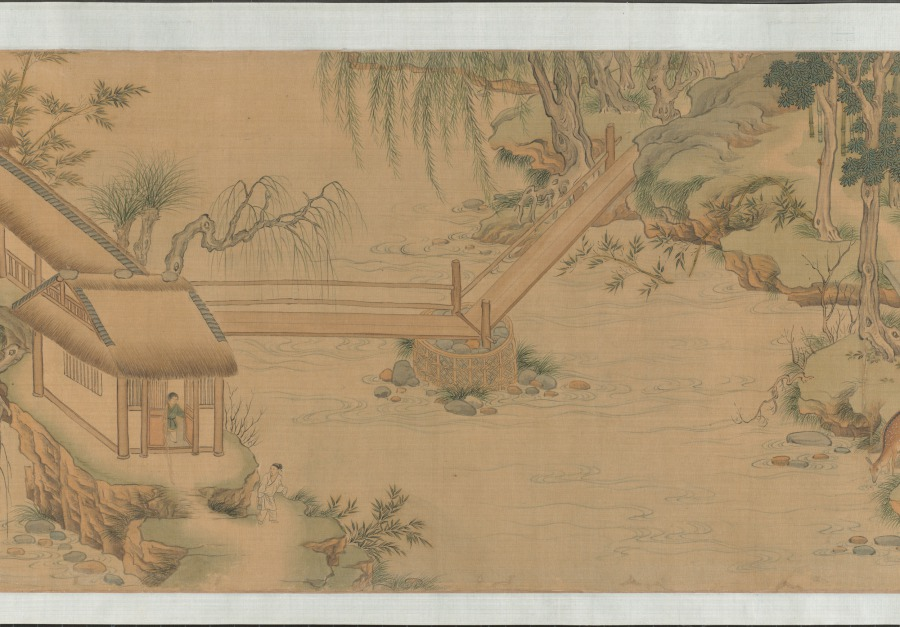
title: Garden for Solitary Enjoyment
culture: China, Ming dynasty (1368–1644)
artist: Qiu Ying (Chinese, 1494–1552)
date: 1515–52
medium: Handscroll; ink and light color on silk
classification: Painting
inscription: Accompanying text of an essay together with seven poems of Sima Guang (1019–1086) and one poem of Su Shi (1037–1101) written by Wen Zhengming (1470–1559) in 1558.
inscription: 2 colophons and 82 seals: 4 seals of Wen Zhengming 文徵明 (1470–1559); 59 seals of Xiang Yuanbian 項元汴 (1525–1590); 1 colophon, dated 1644, and 7 seals of Xiang Yukui 項禹揆 (c. late 1500s–1659); 1 colophon, dated 1880, and 2 seals of Weng Tonghe 翁同龢 (1830–1904); 2 seals of Ch'eng Chen-i (19th c.); 1 seal of Han Ch'ung (19th c.); 4 seals of Wan-go H. C. Weng 翁萬戈 (1918–2020); 3 seals unidentified.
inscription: Colophon by Xiang Yukui 項禹揆 (c. late 1500s–1659): The painting of The Garden for Self-enjoyment on the right by Shih-chou, Mr. Qiu [Qiu Ying] is in the style of Li Lung-mien. Its mood is peaceful, as if meeting the ancient gentlemen face to face among the brushes and silk; it lifts one above the sordid bustle of life. Formerly, my late father handed me this scroll which had only the painting without the written essay. I considered asking a good calligrapher to write the essay to add to it but was afraid that the quality of the writing would not match the painting. Several years later, I saw at a friend's house this essay and poems (of Ssu-ma Kuang] written by Hengshan [Wen Zhengming], once owned by my grandfather; so I spared no expense to obtain it. I rejoiced at this and said: "The divine swords are finally united. How things are pre-destined!" Now my friend Chang Kung-chao's technique for mounting [painting and calligraphy] is excellent. Therefore by daring to take them out and join them together, I can preserve this beautiful story of singular reunion. Xiang Yukui recorded at Hai-yeh-t'ang [hall] two days before New Year's Eve in the jiasheng year of the Chongzhen era [1644]. trans. LYSL/HK/WKH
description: Garden of Solitary Enjoyment refers to a site built in 1073 by the statesman Sima Guang (1019–1086) after he had retired to Luoyang, Henan province. Every spring, visitors would flock to his garden. Each of its seven structures references a historic figure. Sima wrote: I channel streams [like Du Mu], to water flowers [like Bai Juyi], or trim bamboo [like Wang Huizhi]. . . . I know of no joy between heaven and earth that could take its place. Qiu Ying’s painting, created after an 11th-century version of the same theme, must have appealed to garden owners of the Ming dynasty, since it became the template for numerous Suzhou workshop copies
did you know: Sima Guang completed his monumental survey of Chinese history, Zizhi tongjian, in the garden depicted in this painting.